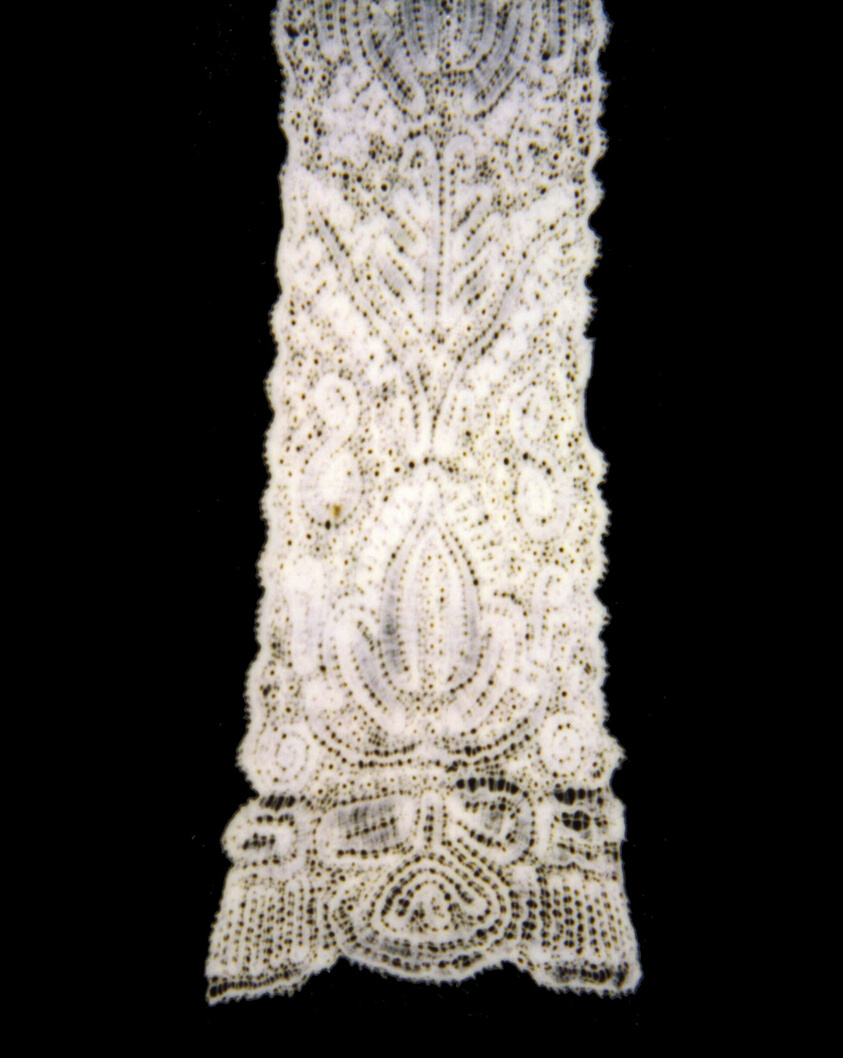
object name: Costume and Accessories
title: Double Lappets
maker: Eastern Europe or Russia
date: 1701/25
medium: Linen, bobbin straight lace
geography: Eastern Europe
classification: costume accessory; lace - bobbin; textile; costume; costume accessory - headdress; costume accessory worn above the waist